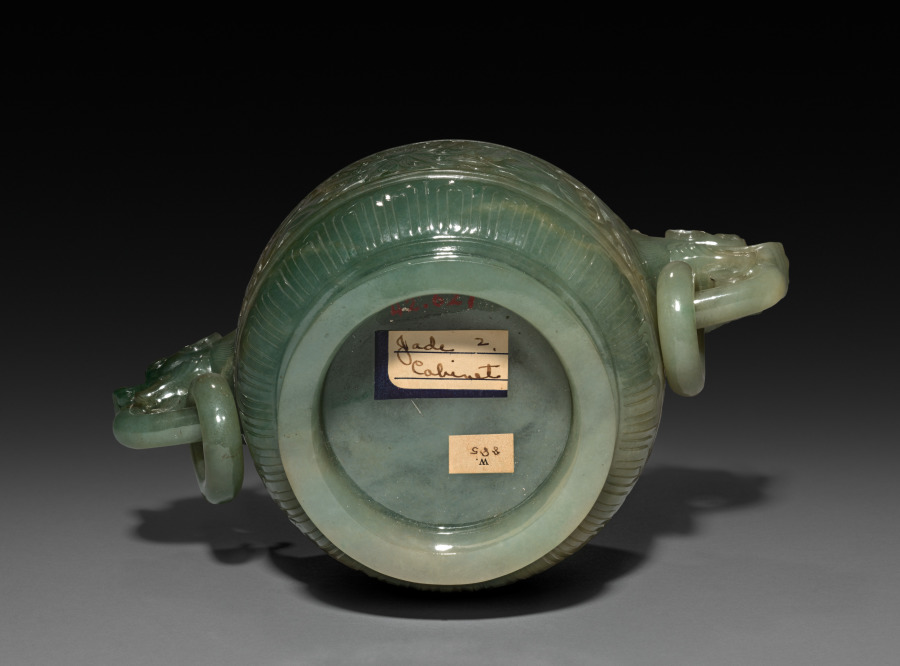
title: Koro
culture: China, Qing dynasty (1644–1911), Qianlong reign (1736–95)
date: 1736–95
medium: jade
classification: Jade